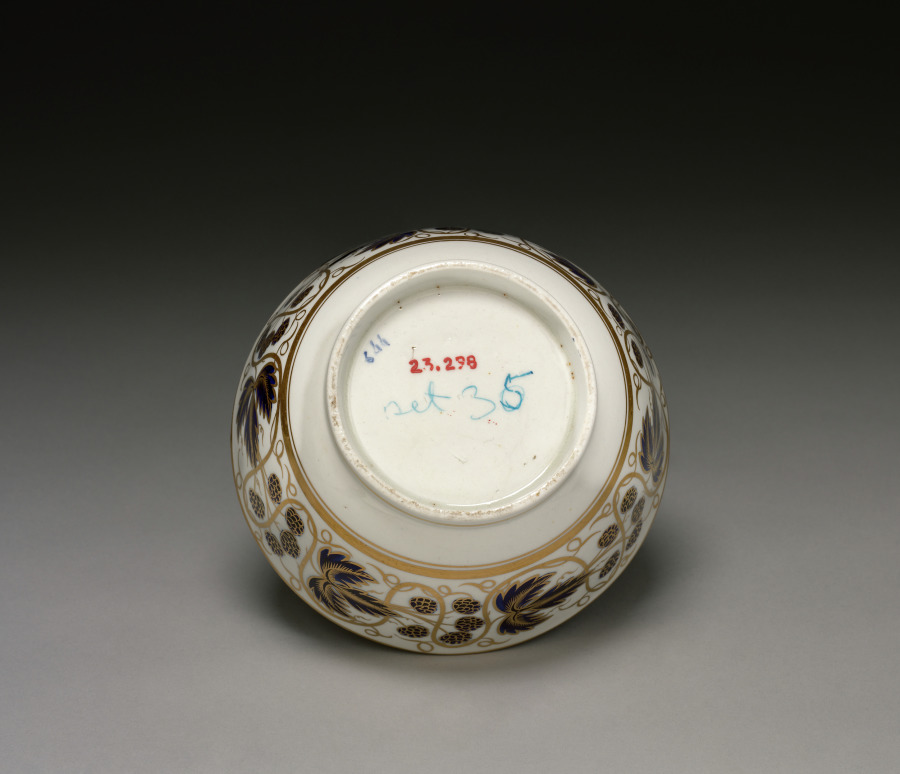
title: Bowl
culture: England, late 18th century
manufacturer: Worcester Porcelain Factory (British, established 1751)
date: late 1700s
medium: porcelain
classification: Ceramic